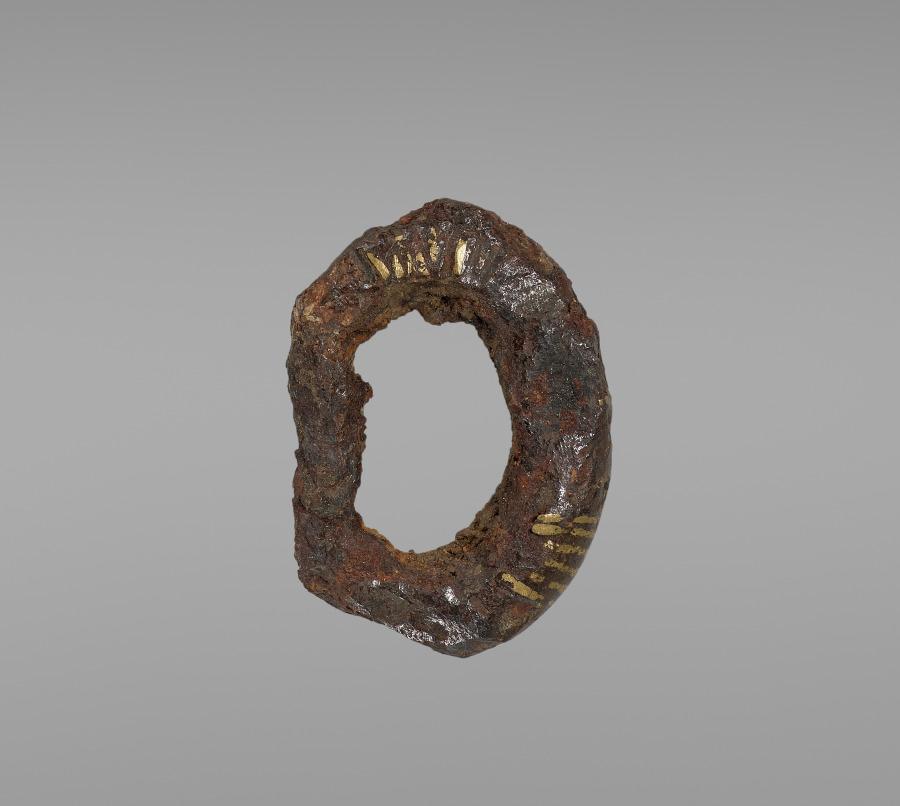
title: Buckle (loop)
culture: Merovingian, Burgundian, Migration period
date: 600s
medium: iron with silver overlay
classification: Jewelry